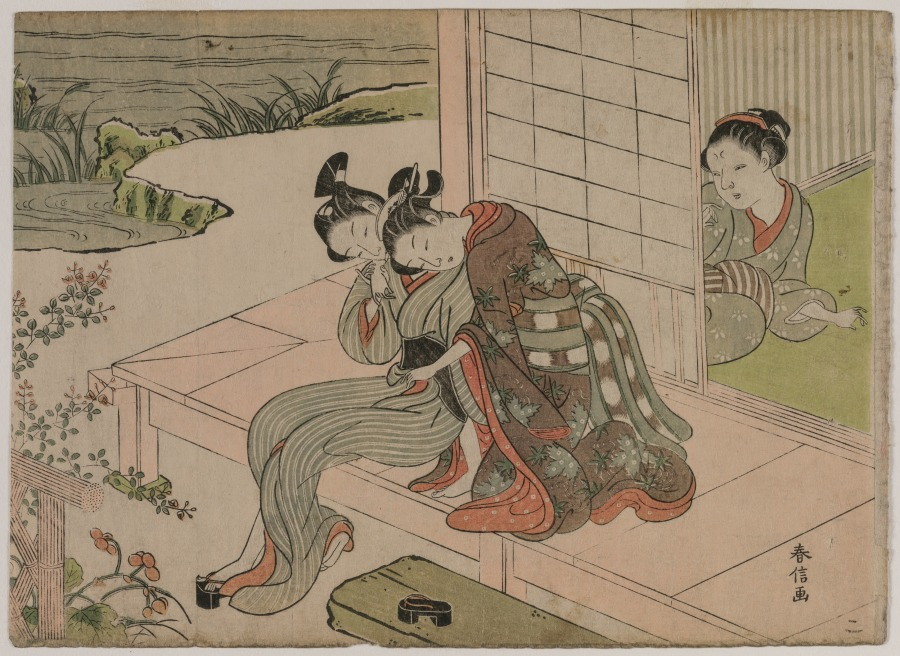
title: Woman Watching Young Couple Embrace on a Veranda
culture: Japan, Edo period (1615–1868)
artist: Suzuki Harunobu (Japanese, 1724–1770)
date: late 1760s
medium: color woodblock print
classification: Print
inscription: Signature: Harunobu ga.